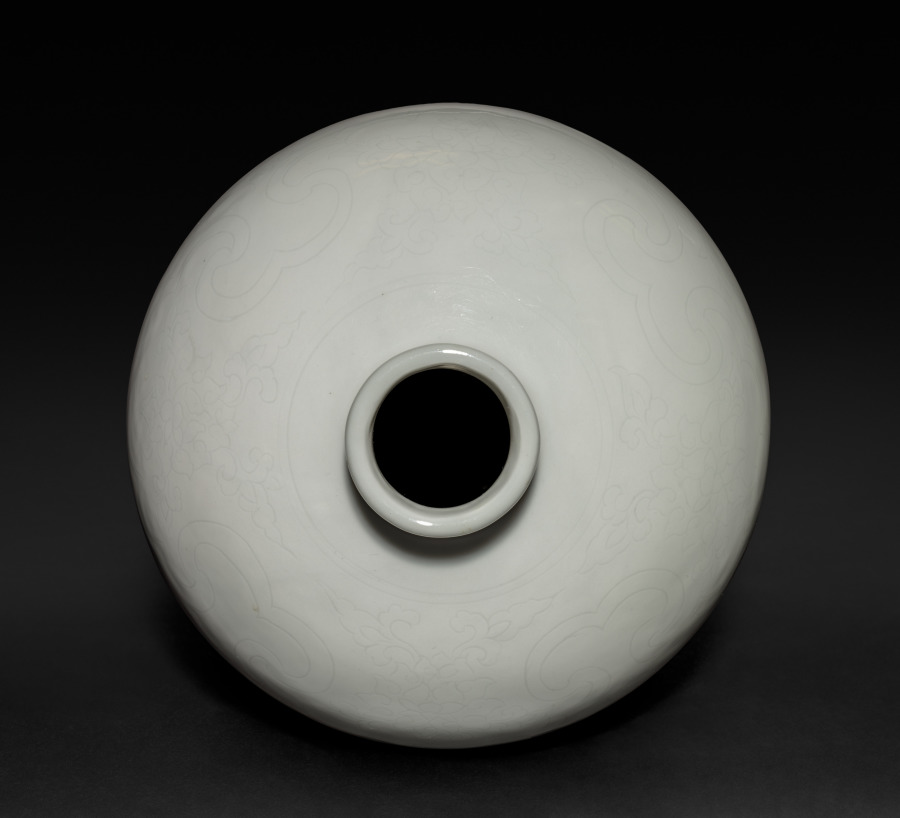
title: Meiping Vase with Cloud Collars and Peony Sprays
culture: China, Jiangxi province, Jingdezhen kilns, Ming dynasty (1368-1644), Yongle period (1403-1424)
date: 1403–24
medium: porcelain with incised decoration and white glaze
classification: Ceramic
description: This beautiful vase, called a meiping, is a testimony to the extremely high standards demanded for imperial white porcelain of the Yongle period. It is exquisitely potted and subtly decorated with "hidden decoration" (anhua) incised into the body. The clear glaze over the white body has a luster and purity; the white color radiates with a soft glow like melting snow, described by the Chinese connoisseurs as tianbai, or "sweetwhite." Tianbai wares were produced for use in imperial offerings and have always been considered a great achievement of the Yongle period.